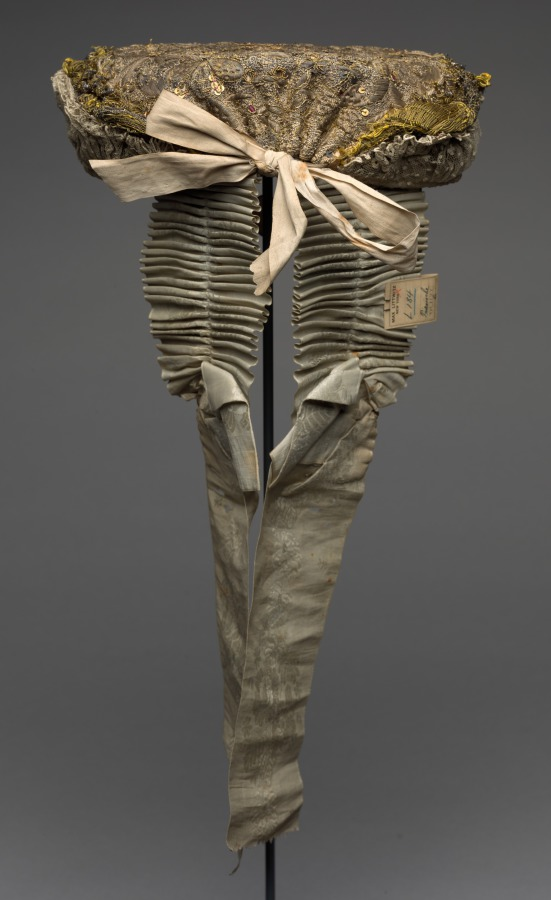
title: Embroidered Headdress (Called "Triesische")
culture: Germany, 18th century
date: 1700s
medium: embroidery, metallic thread and spangles; lace edging and ribbon streamers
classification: Garment